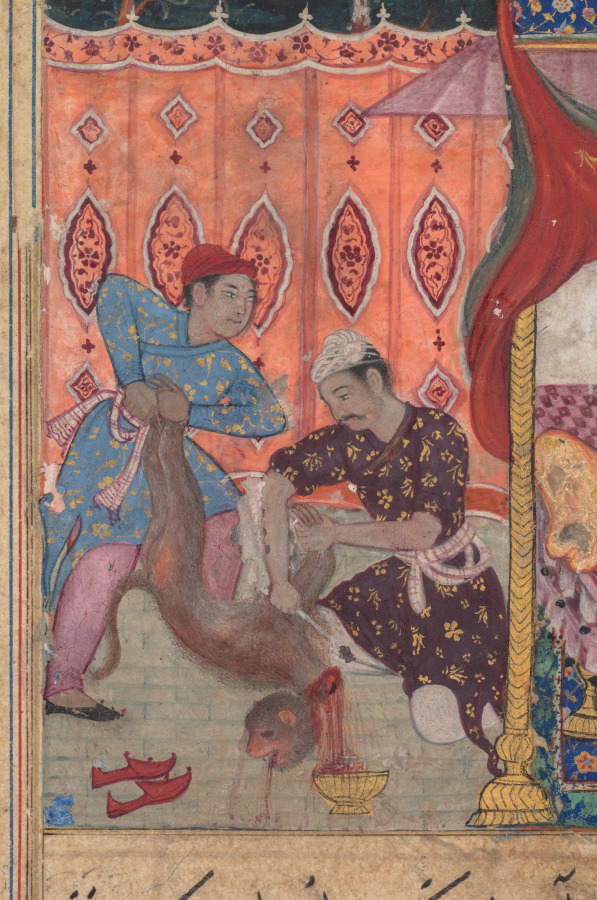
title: The monkey slain, his blood to be used as medicine for the ailing prince he has bitten, from a Tuti-nama (Tales of a Parrot): Fifth Night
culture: Mughal India, court of Akbar (reigned 1556–1605)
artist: Basawan​ (Indian, active mid-1500s)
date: c. 1560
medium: gum tempera, ink, and gold on paper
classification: Painting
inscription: 'amal basāwan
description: Wounded by the chess-playing monkey’s bite, the prince’s hand became increasingly infected. The only cure, his doctors said, was to apply the blood of the monkey to the wound and let it dry. Reluctantly, the prince allowed the monkey to be killed. Two men accomplish this serious work at the left. In the right margin is written the name of the artist, the celebrated Basavana. The Tuti-nama contains the earliest known paintings by the prolific master who was instrumental in shaping the Mughal painting style over subsequent decades.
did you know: Under the covers is the hand that got infected from the monkey bite.